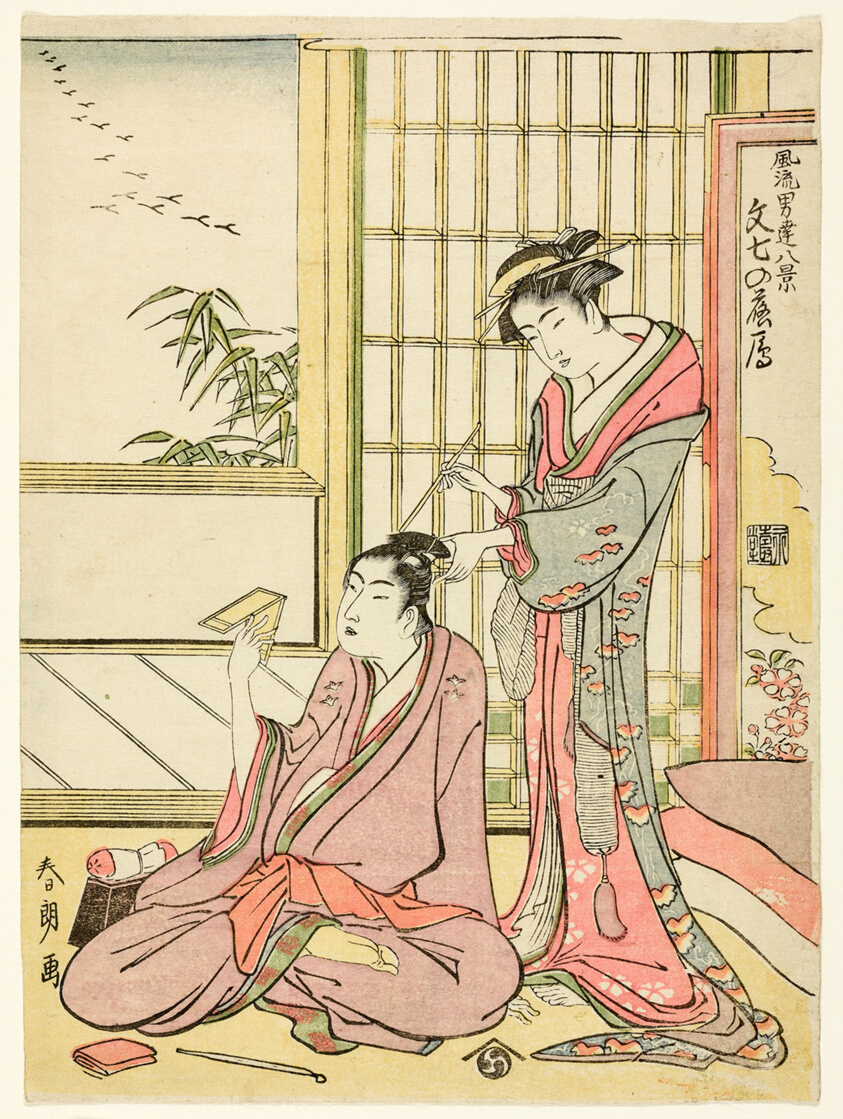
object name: Print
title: Descending Geese for Bunshichi (Bunshichi no rakugan), from the series "Eight Views of Elegant Gallants (Furyu otokodate hakkei)"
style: Japanese (culture or style)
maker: Katsushika Hokusai 葛飾 北斎; Japanese, 1760-1849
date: 1781/89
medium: Color woodblock print; chuban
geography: Japan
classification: woodblock print; print; asian art